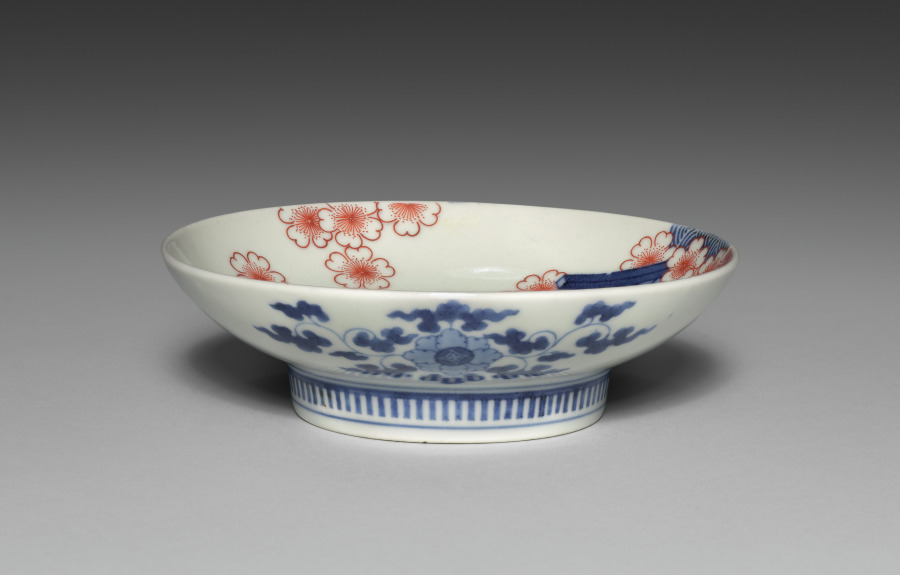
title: Small Dish (Kozara) with Cherry Blossoms in Baskets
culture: Japan, Edo period (1615–1868)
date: c. 1670‒1710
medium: Porcelain with underglaze blue and overglaze color enamel (Hizen ware, Nabeshima type)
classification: Ceramic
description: The cherry blossoms and stylized wave pattern that appear on this dish remain popular today.